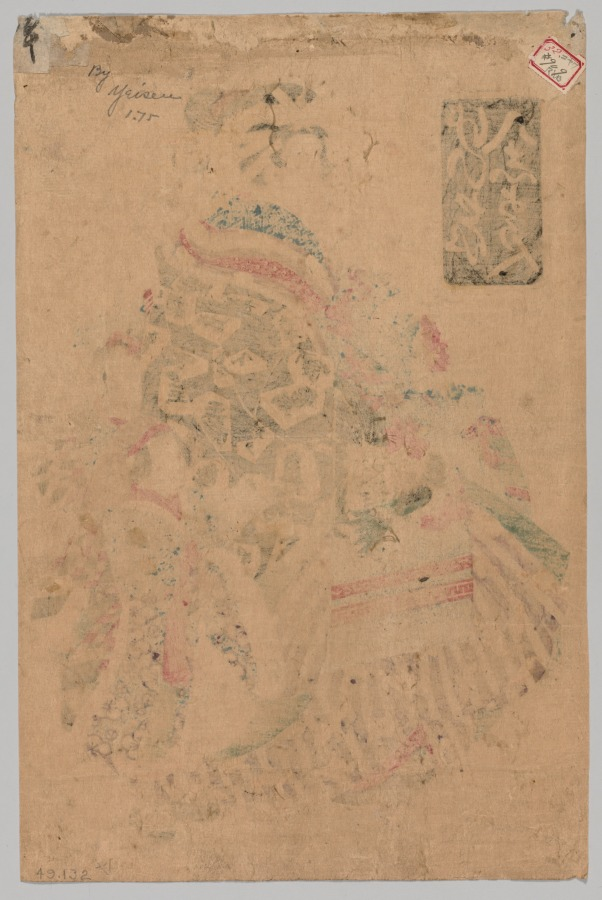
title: Chōdayu of the Okamotoya from the series ?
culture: Japan, Edo period (1615–1868)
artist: Keisai Eisen (Japanese, 1790–1848)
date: 1790–1848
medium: color woodblock print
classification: Print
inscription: 岡本屋内長太夫